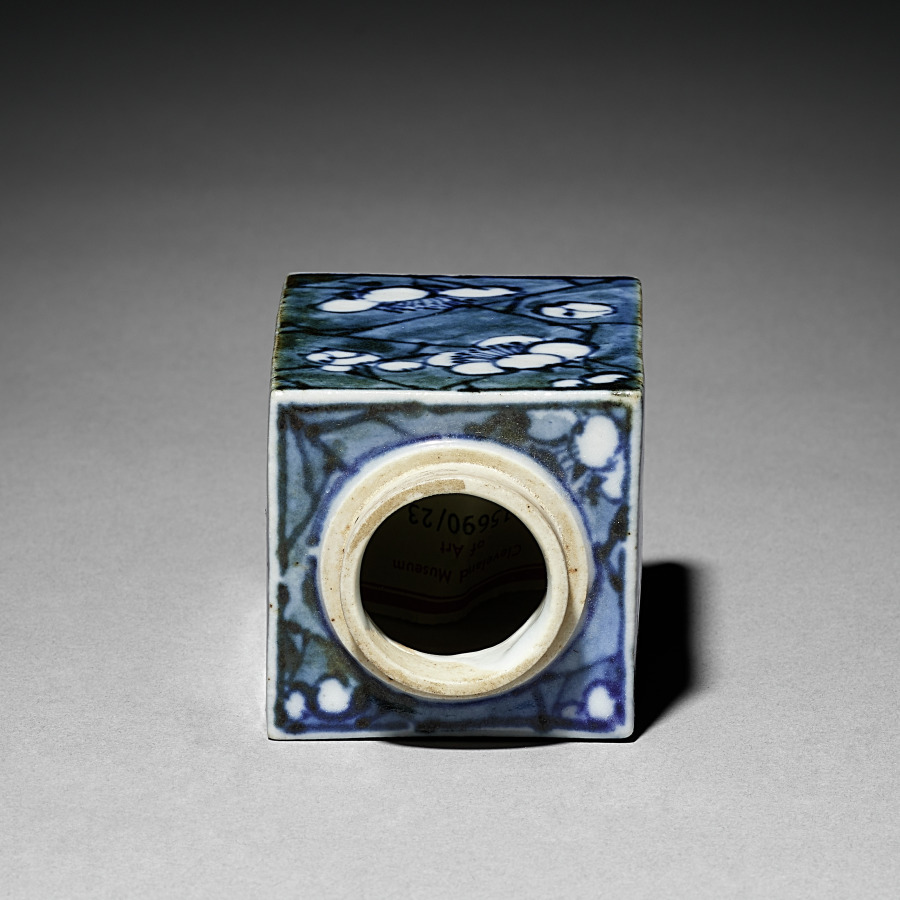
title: Tea Container with Plum Blossoms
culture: Japan, Edo period (1615–1868)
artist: Aoki Mokubei (Japanese, 1767–1833)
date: early 1800s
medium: porcelain with underglaze blue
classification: Ceramic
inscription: signed "Ro Mokubei" on base in underglaze blue.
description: Aoki Mokubei, born into a family of restaurateurs, was a potter, calligrapher, painter, and scholar, and is considered one of the three masters of later Edo period Kyoto ceramics. He specialized in porcelains fashioned after Chinese prototypes, and created works for steeped tea (sencha) such as these matching tea caddies decorated in an underglaze blue called sometsuke—literally “with applied dye.” He signed them on their bottoms. They also have intricately patterned silk sleeves to both beautify and protect them. On the exterior of the lid of the outer wooden box that contains them, it is written that Mokubei inscribed and painted an image on the box. On the interior of the lid, the signature and seals of a former owner are written. Mokubei has signed the lid of the inner box, and a charming ink and light color composition of West Lake in Hangzhou in China covers its three sides. On the fourth side is a long inscription by Mokubei describing the scene.